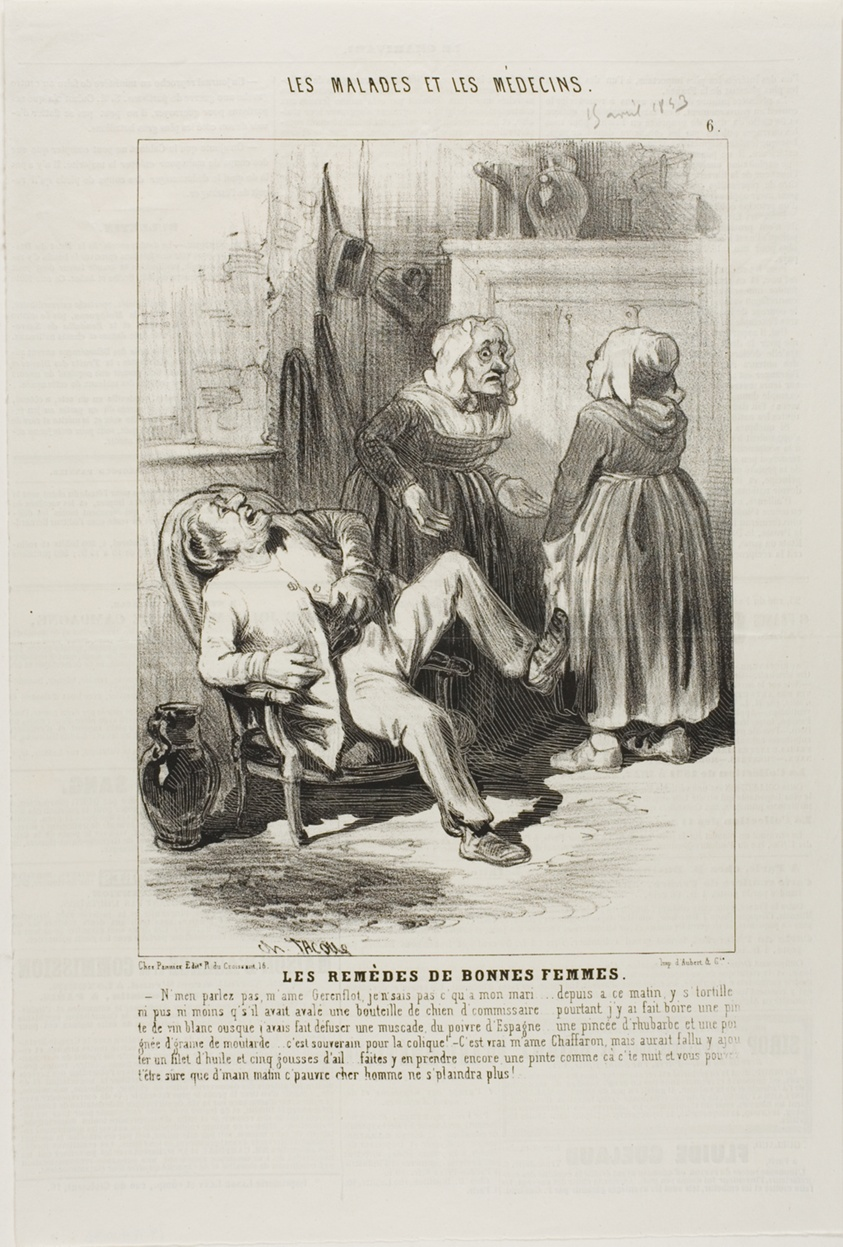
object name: Print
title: Old Womens' Remedies (plate 6)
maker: Charles Émile Jacque (French, 1813-1894)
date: 1843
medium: Lithograph in black on ivory wove paper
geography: France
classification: lithograph; print; prints and drawing